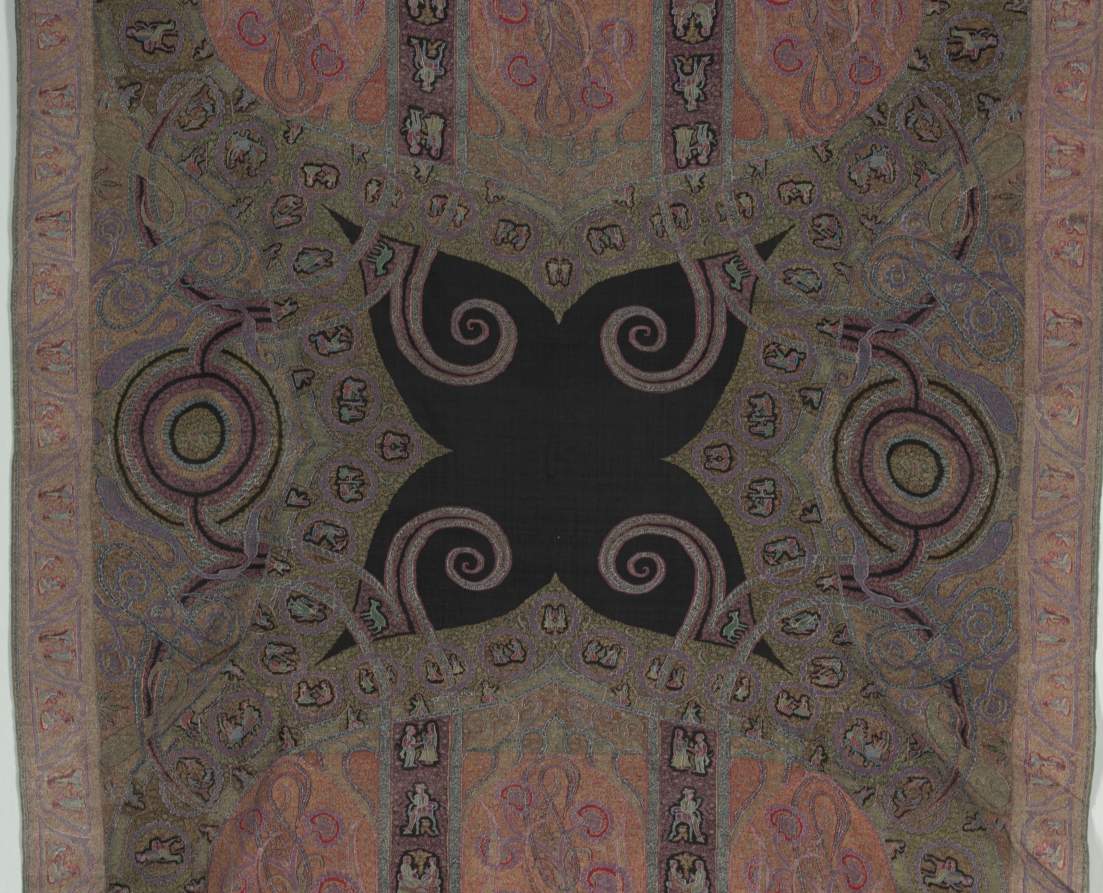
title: Long shawl with woven figures and animals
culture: India, Kashmir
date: c. 1885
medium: 2/2 twill tapestry weave, double interlocked and pieced: wool (possibly pashmina)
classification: Textile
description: Kashmir shawls from India were status symbols in Europe during the 1800s, and few are as rare as this woven example. Over 200 human figures take part in drinking, smoking, dancing, and falconry in the Indian princely scenes that enliven the shawl’s borders and four dark stripes. The stripes alternate with large elongated boteh, or paisley, motifs that intertwine with blossoming stems in a European style adapted by Kashmiri textile artists. This extraordinary woven shawl was probably made to dazzle the jury at one of the European expositions of industrial products, as almost all other figural shawls were embroidered. It was woven in many pieces and then skillfully joined with colorful harlequin end borders.